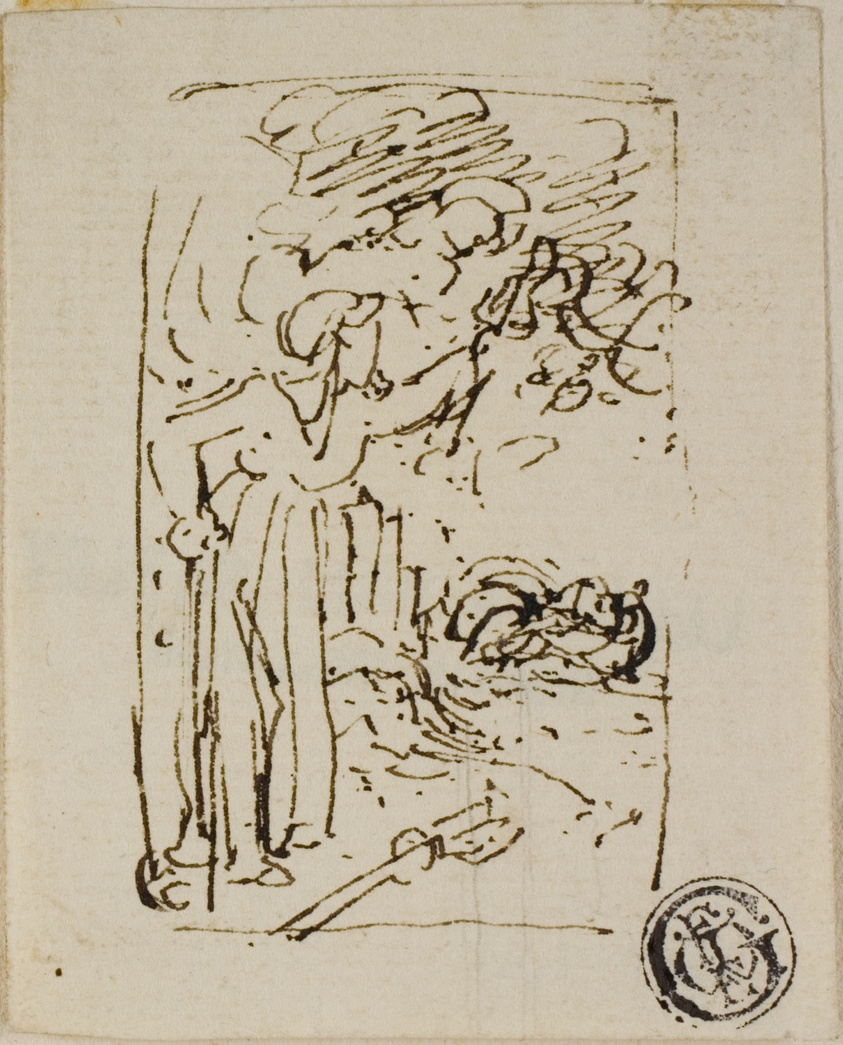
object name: Drawing and Watercolor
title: Sketch of Figure Leaning on Cane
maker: Attributed to Thomas Stothard; English, 1755-1834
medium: Pen and brown ink on cream laid paper, tipped onto cream wove paper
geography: England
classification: pen and ink drawings; drawings (visual works); prints and drawing